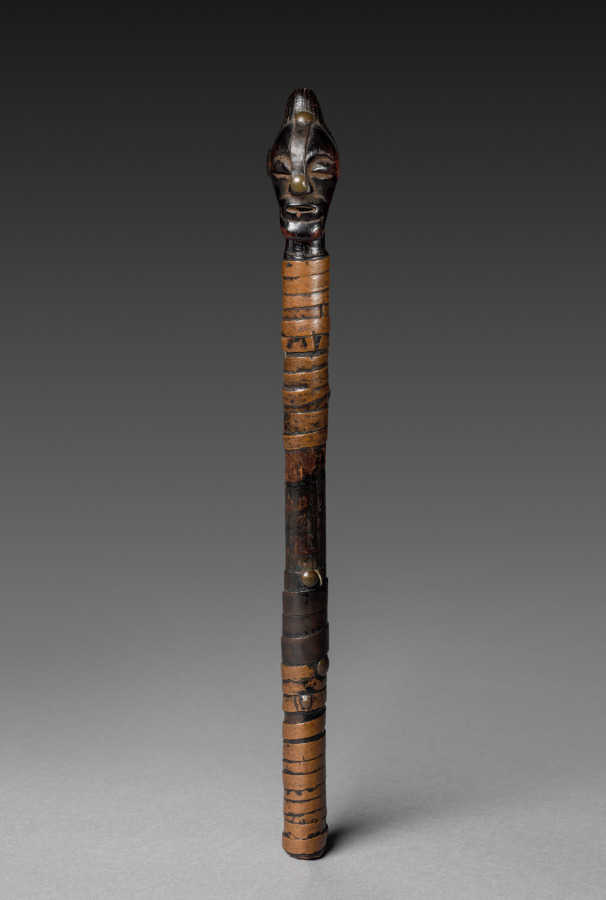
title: Fragment of a Staff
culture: Africa, Central Africa, Democratic Republic of the Congo, Kalundwe, unknown maker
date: late 1800s–early 1900s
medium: Wood, copper alloy, upholstery studs, and iron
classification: Implements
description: Though modest in scale and fragmentary in that its blade is missing, this is perhaps one of the finest surviving examples of a sculptural object in the little-known style of the Kalundwe people. It represents a poorly documented culture's artistic style that sits between the Songye to the west and the Luba to the east. Showing surface traces of continuous manipulation, the shaft of this short staff is entirely wrapped with a copper sheet, a common feature of rank emblems. Originally, it would have had an iron blade projecting from its mouth. However, rather than serving as a functional tool for carving, it would be hung over the shoulder to signal the high rank of its owner, be it a chief, another dignitary, or even a sculptor.